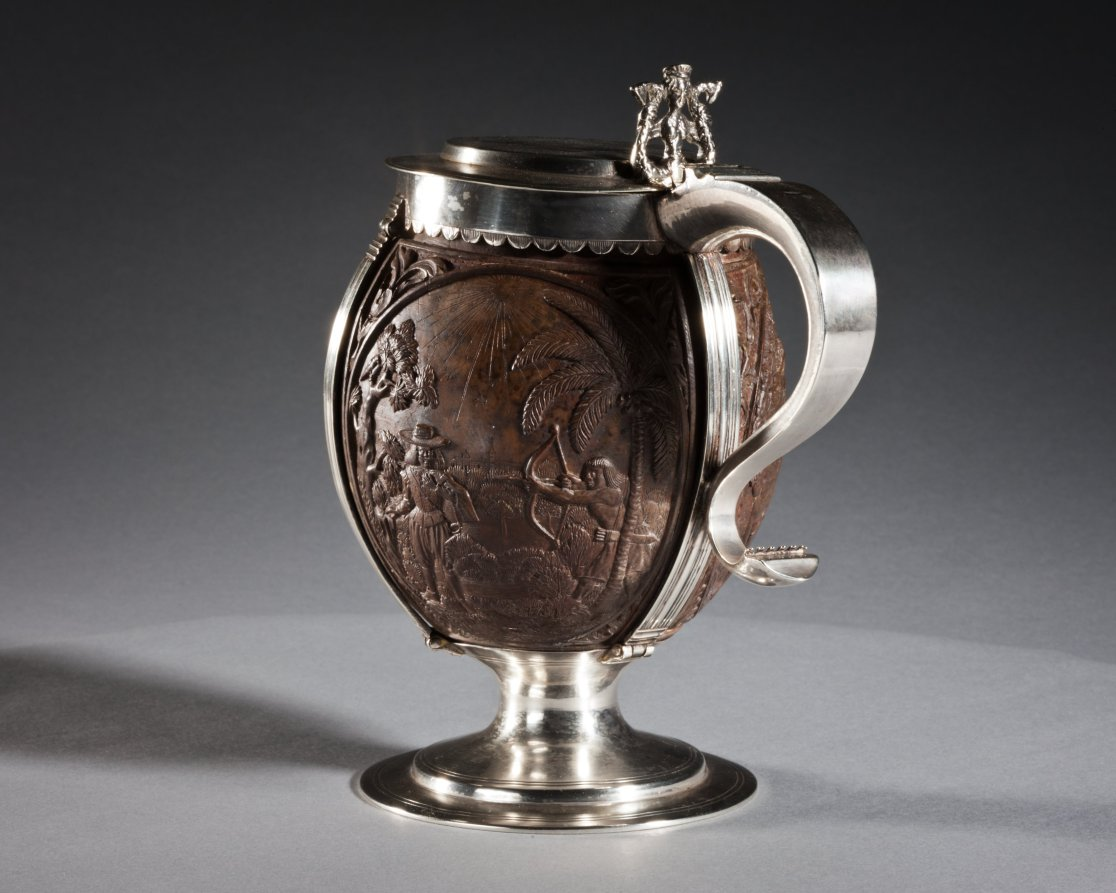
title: Coconut Cup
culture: carved coconut, probably The Netherlands; silver mount, probably England, 17th century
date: c. 1630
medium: carved coconut in silver mount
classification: Metalwork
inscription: top lid has engraved coat-of-arms, underside of lid has inscription: George Lewis TIVERTON Feby, 1st 1760.